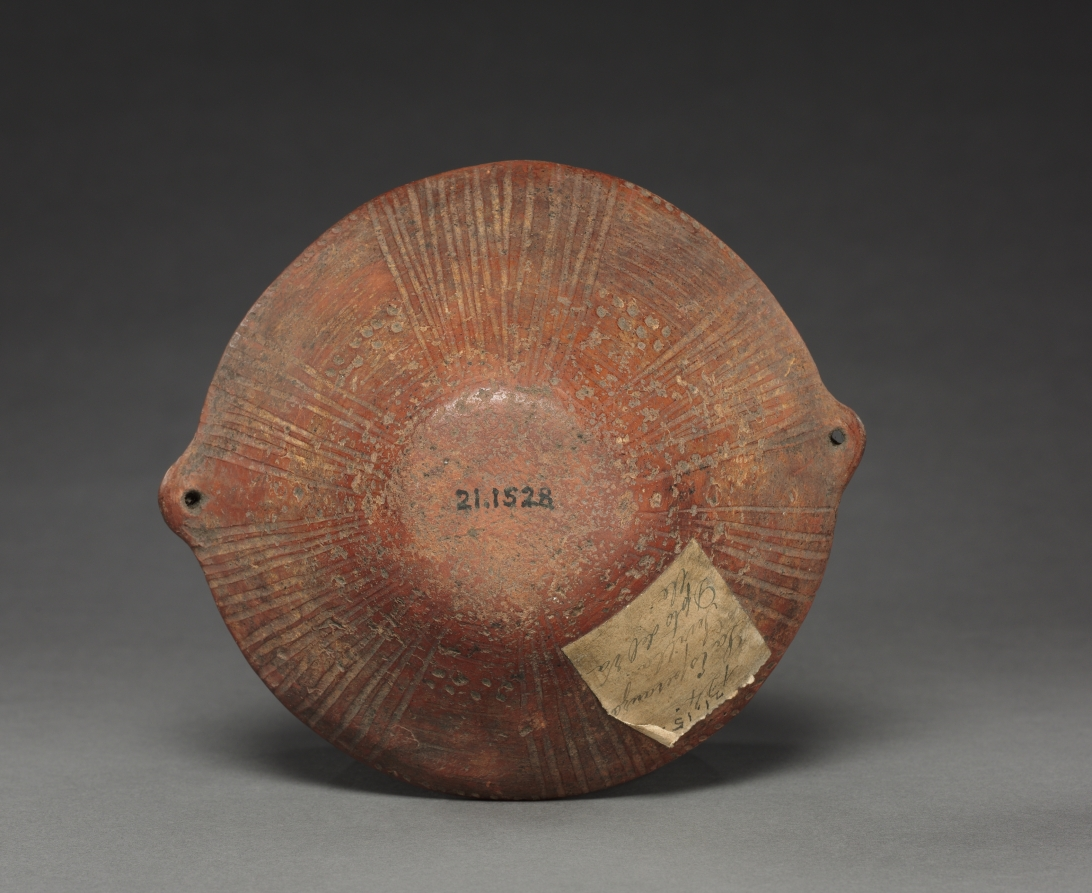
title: Dish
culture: Colombia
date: before 1550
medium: red ware with incised patterns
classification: Ceramic